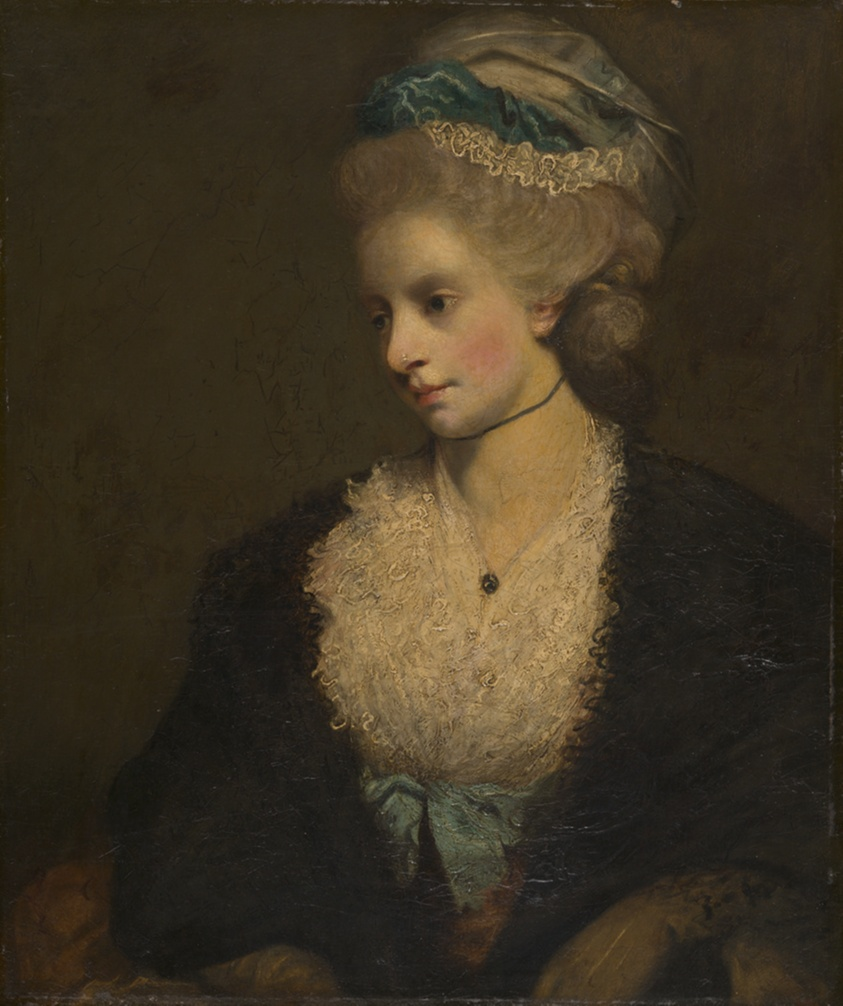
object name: Painting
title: Theophilia Gwatkin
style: 18th Century, british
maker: Sir Joshua Reynolds (English, 1723–1792)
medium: Oil on canvas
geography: England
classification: portrait; painting; paint; oil paintings (visual works); british; european painting; oil on canvas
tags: portraits: female subject, portraits, jewelry, headdresses, dresses, lace, blue, blue (color), white (color), woman, britain, England, English, portrait